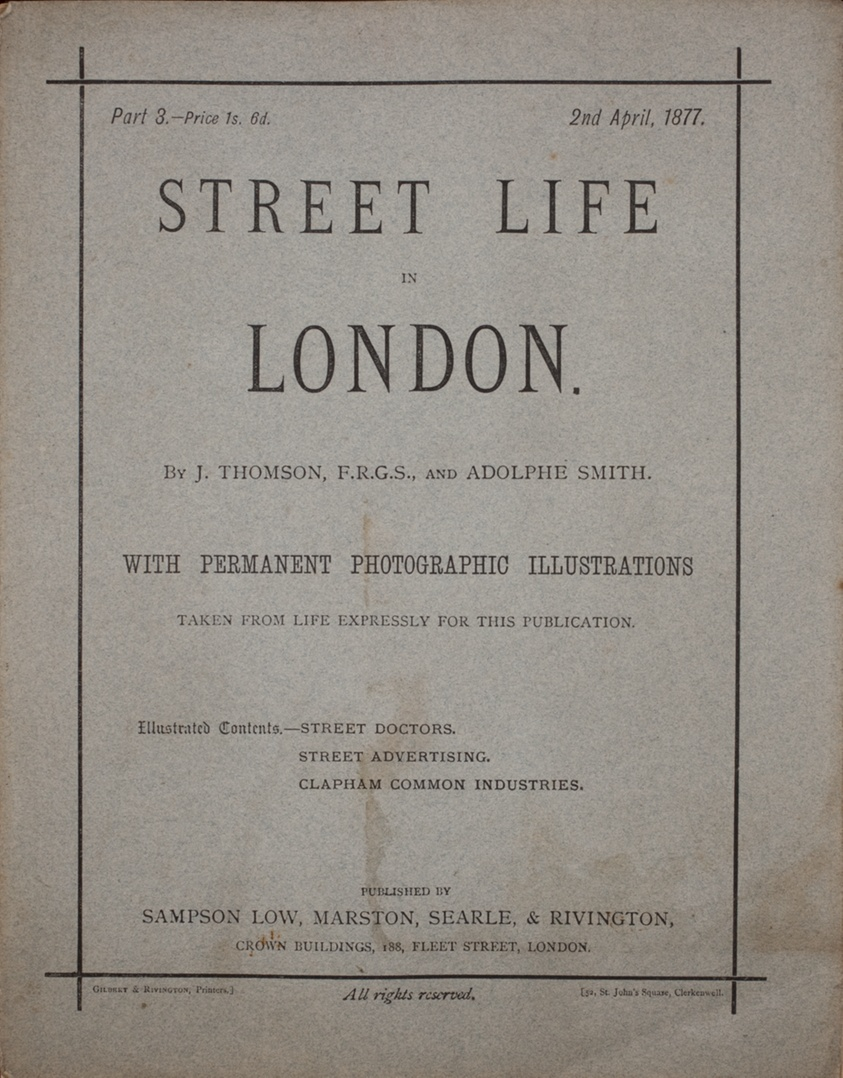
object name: Photograph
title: Street Life in London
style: 19th century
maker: John Thomson (Scottish, 1837–1921) and; Adolphe Smith (English, 1846–1925)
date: c. 1875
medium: Woodburytypes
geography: Scotland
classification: photograph; photography